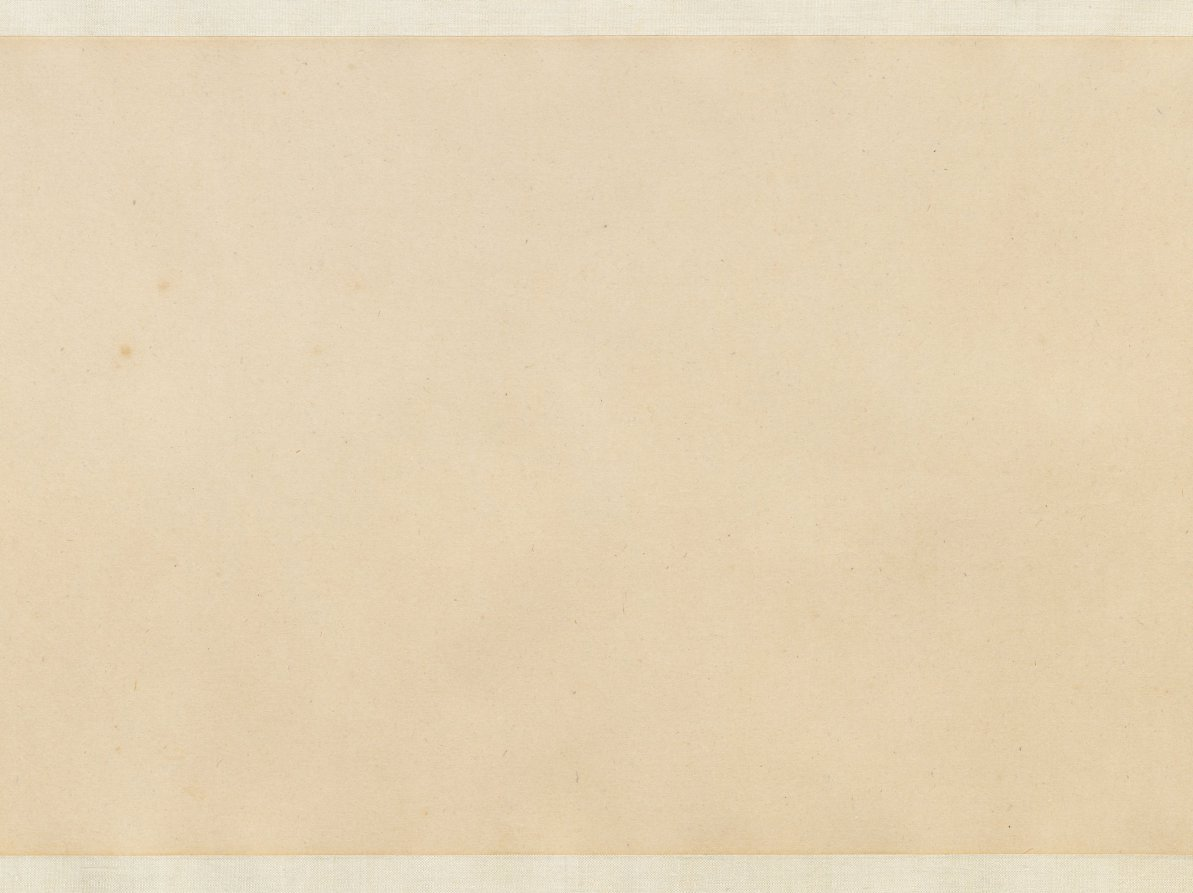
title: Sericulture (The Process of Making Silk)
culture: China, Southern Song dynasty (1127-1279)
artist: attributed to Liang Kai (Chinese, mid-1100s–early 1200s)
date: early 1200s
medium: Handscroll; ink and color on silk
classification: Painting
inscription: 3 colophons and 7 seals of Ch'eng Ch'i (20th c.).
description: By the Southern Song period, the economic center of the silk industry had shifted to the lower Yangzi delta, while the north continued to be troubled by wars. Divided into three sections, the handscroll illustrates 14 steps in the process of making silk, from the raising of silkworms to the weaving of silk cloth. The scroll’s scenes follow the illustrations of Lou Shou’s (1090–1162) Pictures of Tilling and Weaving (gengzhi tu), the first recorded painting of this genre, which was conceived in Hangzhou around 1145. However, in the Cleveland painting the artist groups several scenes of sericulture together under the roof of an open structure.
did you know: The painting is attributed to Liang Kai, a court artist active from about 1201 to 1204 at the Imperial Painting Academy in the city of Hangzhou, a major silk weaving center from that time to the present day.